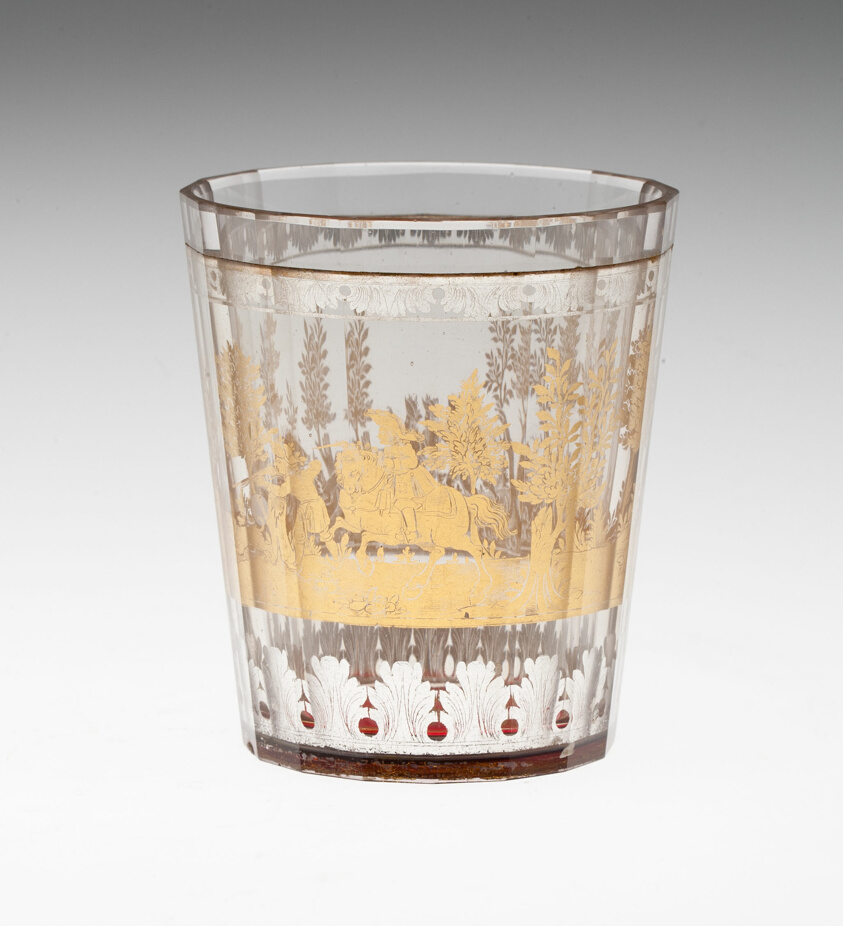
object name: Glass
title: Beaker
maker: Bohemia, Czech Republic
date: c. 1730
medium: Glass with engraved gold leaf decoration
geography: Bohemia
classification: drinking vessel; glass; european decorative arts